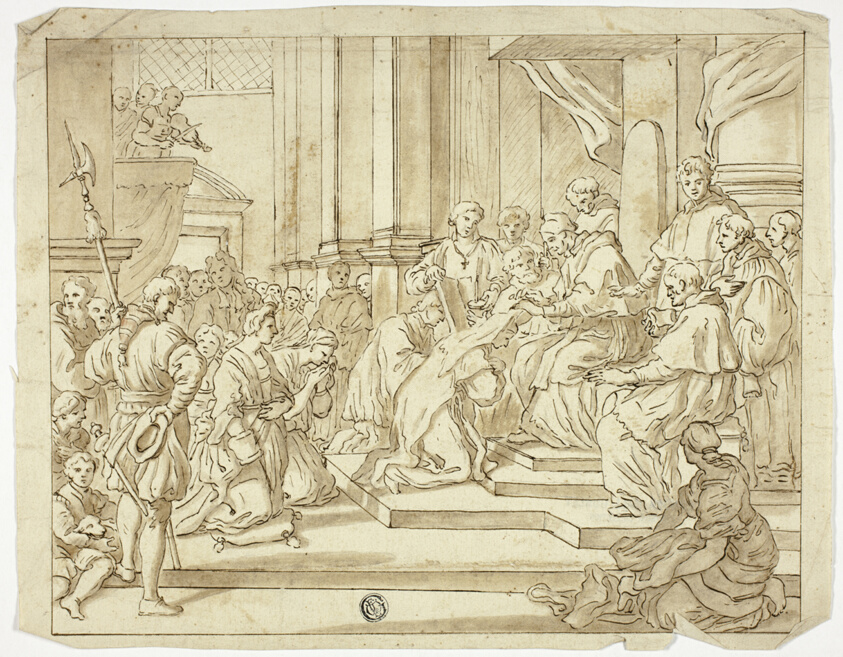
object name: Drawing and Watercolor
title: Pope Blessing Nun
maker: After Francesco Solimena; Italian, 1657-1747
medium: Pen and brown ink with brush and brown wash, over traces of black chalk, on ivory laid paper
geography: Italy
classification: pen and ink drawings; drawings (visual works); prints and drawing